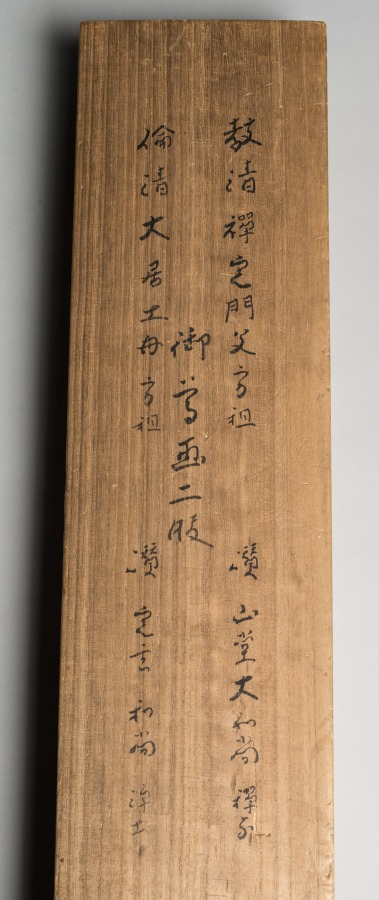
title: Pair of Portraits of Samurai-Officials: Hirai Kyosei and Hirai Rinsei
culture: Japan, Edo period (1615–1868)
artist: Sando Hyosho (Japanese)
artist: Tsukioka Settei (Japanese, 1710–1786)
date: 1776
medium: hanging scrolls; ink and color on silk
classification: Painting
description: In this pair of figure paintings, the artist provided generational portraits of two clan leaders from the Hirai family, accompanied by lengthy inscriptions in a distinctive calligraphic style from separate scholar-officials.